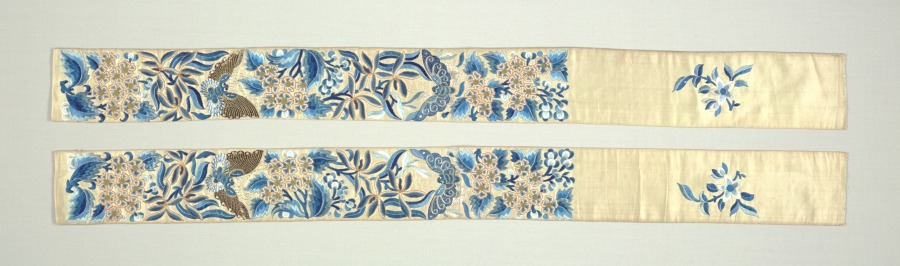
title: Pair of Sleeve Bands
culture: China, Qing dynasty (1644-1911)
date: 1800s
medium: Silk, satin weave, embroidery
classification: Garment